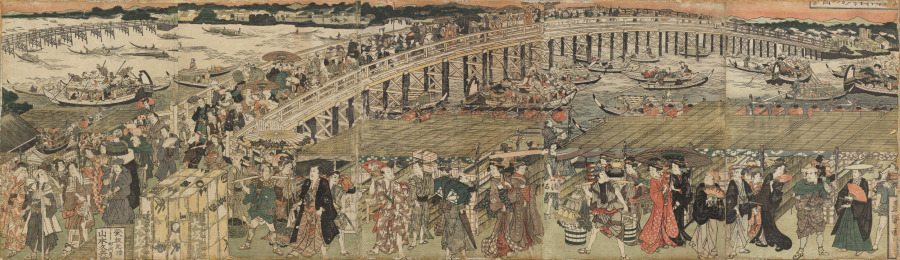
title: Cooling Off at Ryōgoku Bridge in Edo, a Pentaptych (Edo Ryôgoku suzumi no zu, gomai tsuzuki)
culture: Japan, Edo period (1615–1868)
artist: Utagawa Toyokuni (Japanese, 1769–1825)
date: 1811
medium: Pentaptych of color woodblock prints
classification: Print